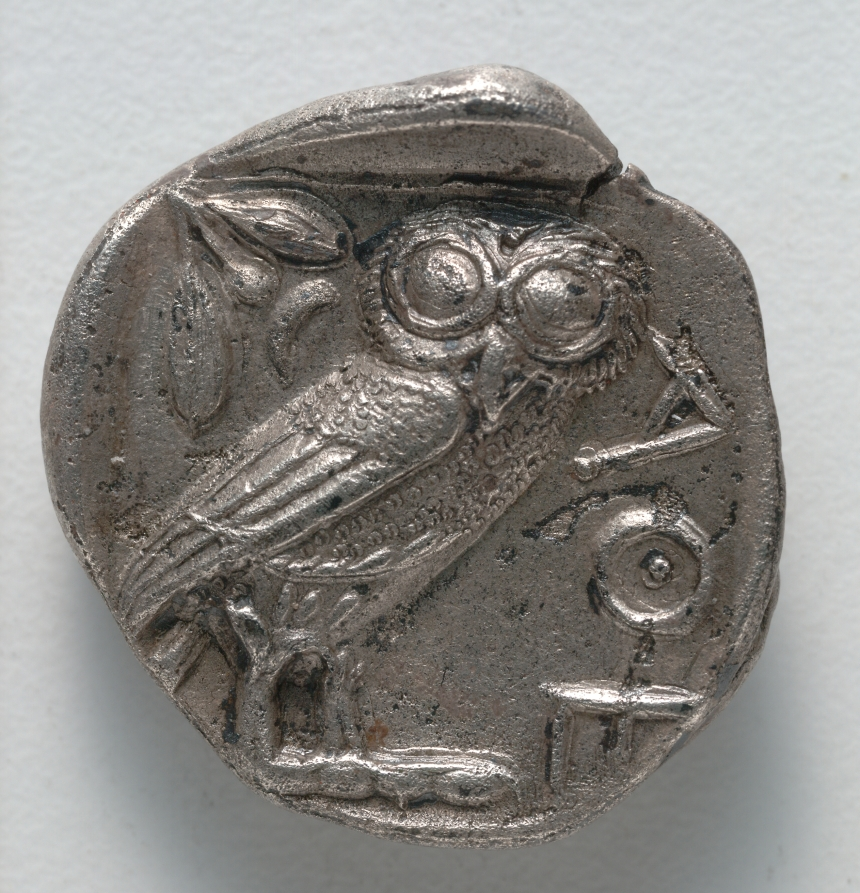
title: Tetradrachm: Owl, standing, r., crescent moon and olive branch above (reverse)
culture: Greek, minted at Athens (Attica)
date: 449–440 BCE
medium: silver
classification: Coins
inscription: ΑΘΕ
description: Incorporating the first three letters of the city name—ΑΘΕ—with then-iconic images of the patron goddess Athena and her owl, the Athenian tetradrachm was among the most widely traded and most recognizable coins of the ancient world. The olive leaves on Athena’s helmet and the small crescent moon behind the owl date three of these coins after the Persian Wars.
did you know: The images of Athena on the obverse and her owl here unmistakably identify this coin as Athenian.